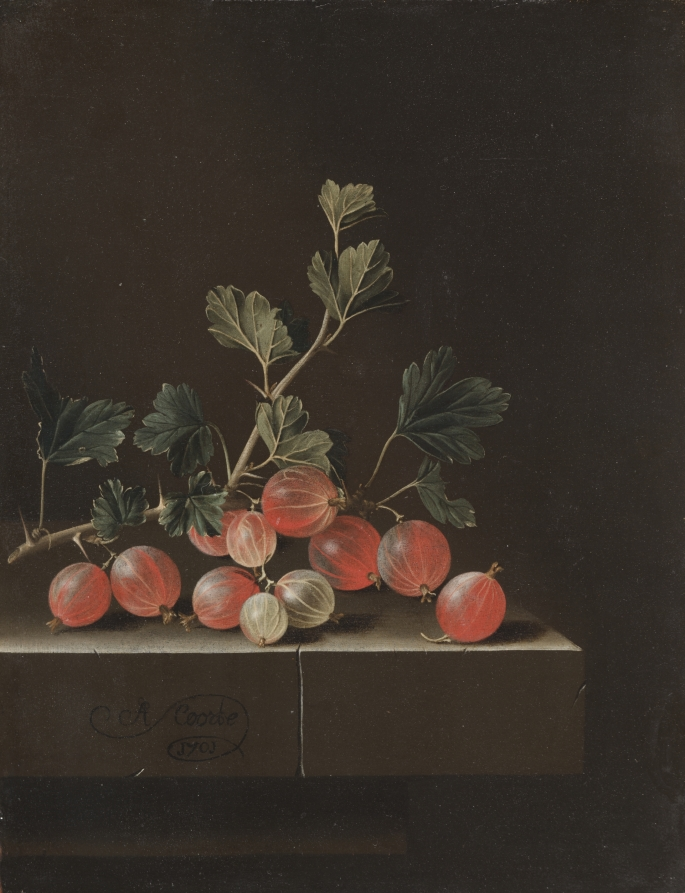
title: Gooseberries on a Table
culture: Netherlands, early 18th Century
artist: Adriaen Coorte (Dutch, 1660–1707)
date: 1701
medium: oil on paper mounted on wood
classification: Painting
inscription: Signed lower left: "A Coorte / 1701"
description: Coorte worked in Middelburg, a wealthy maritime city in the southern part of the Netherlands that fostered a poetic, scientific, and spiritual examination of the natural world. Gooseberries—a modest, local pleasure—could be picked in the wild, although Dutch gardeners in the 1600s were the first to cultivate them to improve their taste. The strong illumination gives the plant a stark grandeur, despite the small scale, and the dark background emphasizes the fruit's delicate translucency. The dessicated flower petals and waxy leaves contrast with the succulent gooseberries, with their skin on the verge of bursting.